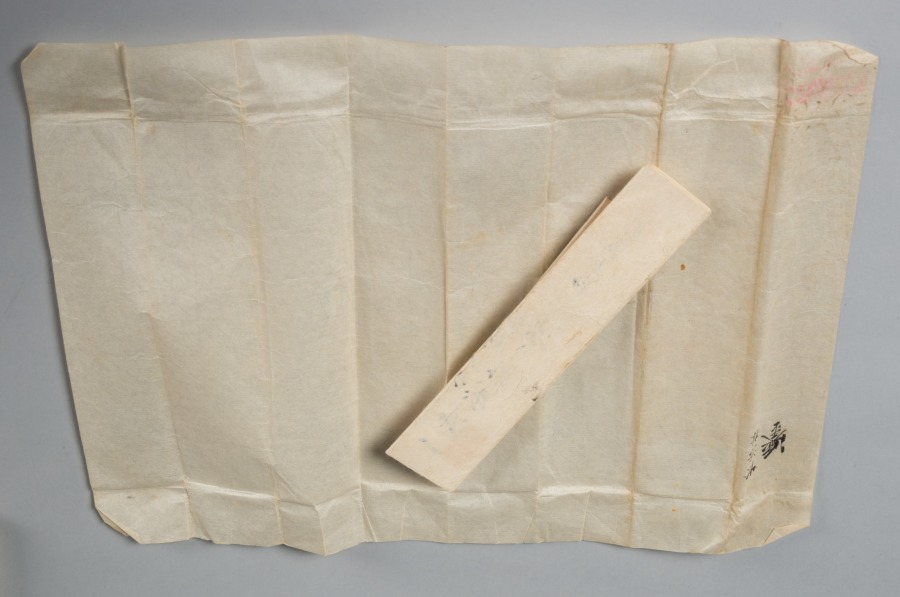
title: Happy Forest, from Water Margin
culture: Japan, Edo period (1615–1868)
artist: Matsumura Goshun (Japanese, 1752–1811)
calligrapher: and Amenomori Shōteki (Japanese, 1731–1786)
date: late 1700s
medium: hanging scroll; ink and color on paper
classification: Painting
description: The Chinese literary classic Water Margin is set in the 1120s and tells the story of 108 outlaws who first rebel against the government and then join forces with it. This painting depicts an episode in which hero Wu Song reclaims the tavern Happy Forest for its rightful owner, the prison warden’s son, Shi En. To prepare for the fight, Wu Song drinks a lot of wine. The painting was inscribed with a quote in which an ally describes Wu Song’s fighting style. It reads as follows: Where his twin fists rise, clouds and thunder roar, When his flying kick comes, wind and rain tremble.